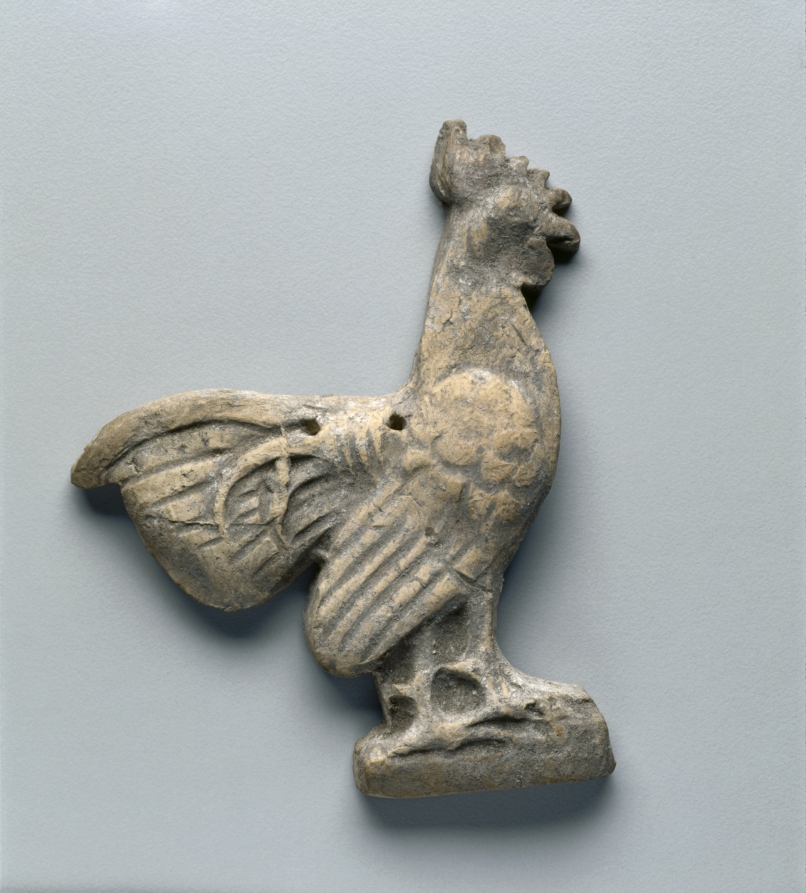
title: Cock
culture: Greece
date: 500s BCE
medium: terracotta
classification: Sculpture